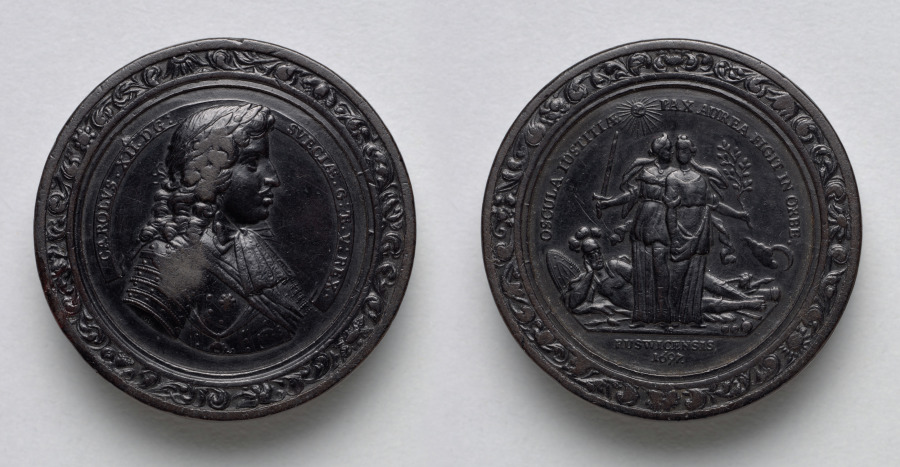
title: Gaming Piece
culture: Germany, late 17th-early 18th Century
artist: Martin Brunner (German, 1659–1725)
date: c.1700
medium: wood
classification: Furniture and woodwork